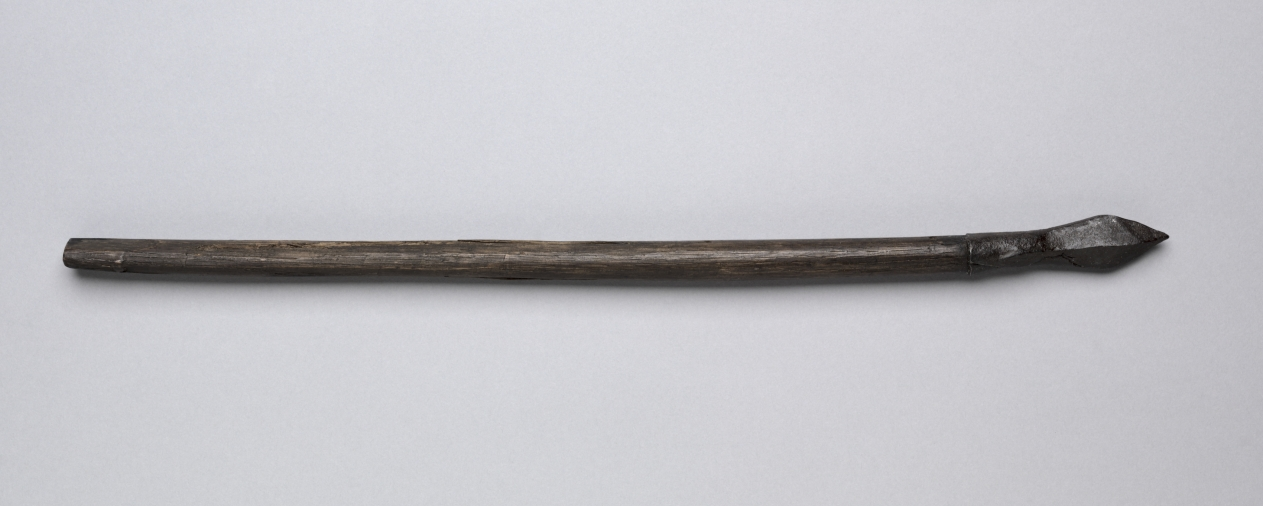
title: Crossbow Bolt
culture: Germany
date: 1500s-1600s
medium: wood, leather, steel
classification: Arms and Armor